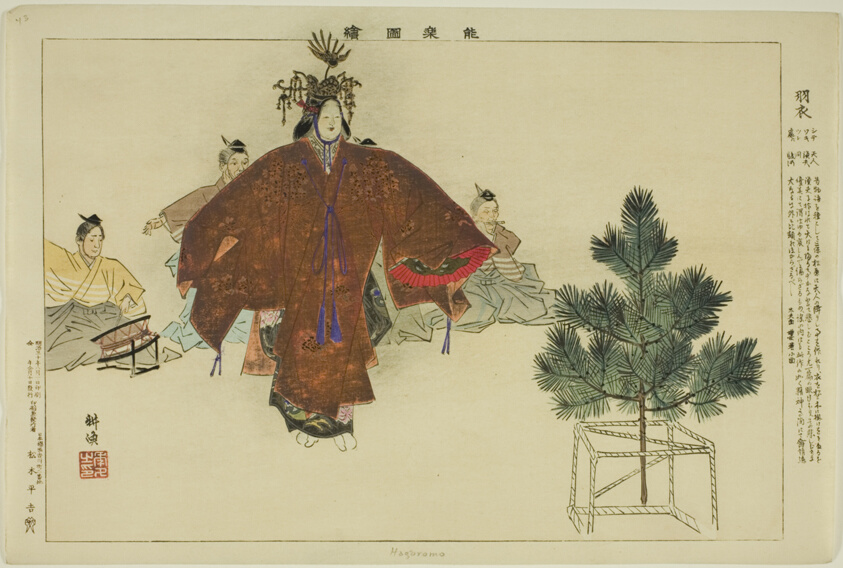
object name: Print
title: Hagoromo, from the series "Pictures of No Performances (Nogaku Zue)"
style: Japanese (culture or style)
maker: Tsukioka Kogyo; Japanese, 1869-1927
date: 1898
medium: Color woodblock print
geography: Japan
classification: woodblock print; print; asian art